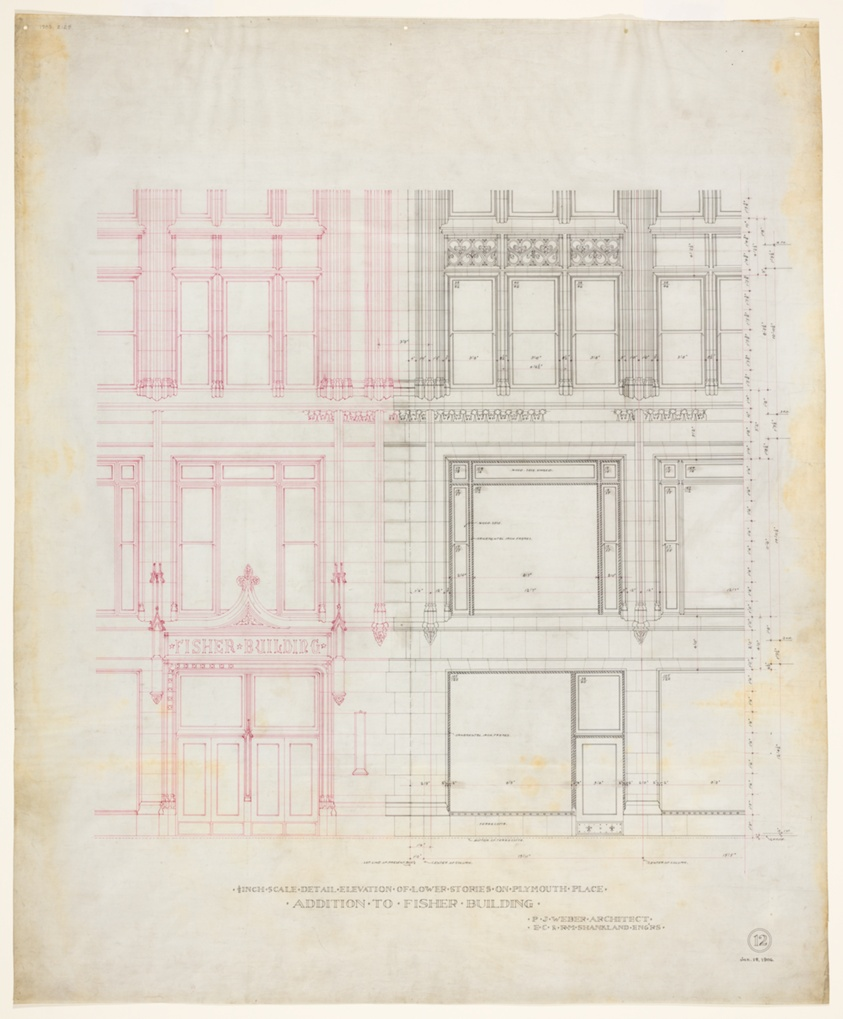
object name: Architectural Drawing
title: Fisher Building Addition, Chicago, Illinois, Elevation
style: 19th century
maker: Peter Joseph Weber (American, 1863-1923); Howells & Stokes (American, Unknown); P J Weber (American, Chicago, born 19th Cen - d. 20th Cen); Lord & Hewlett (American, act. 1920s)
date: 1890 1904.; 1913–1914.; 1893.; 1901; 1917.; 1917–1918; c.1917; 1914.; 1911–1913.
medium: Black and red ink on linen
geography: Chicago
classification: architectural drawing; architecture; elevation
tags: buildings, urban planning, drawing, design, architecture, elevation, illinois, Chicago